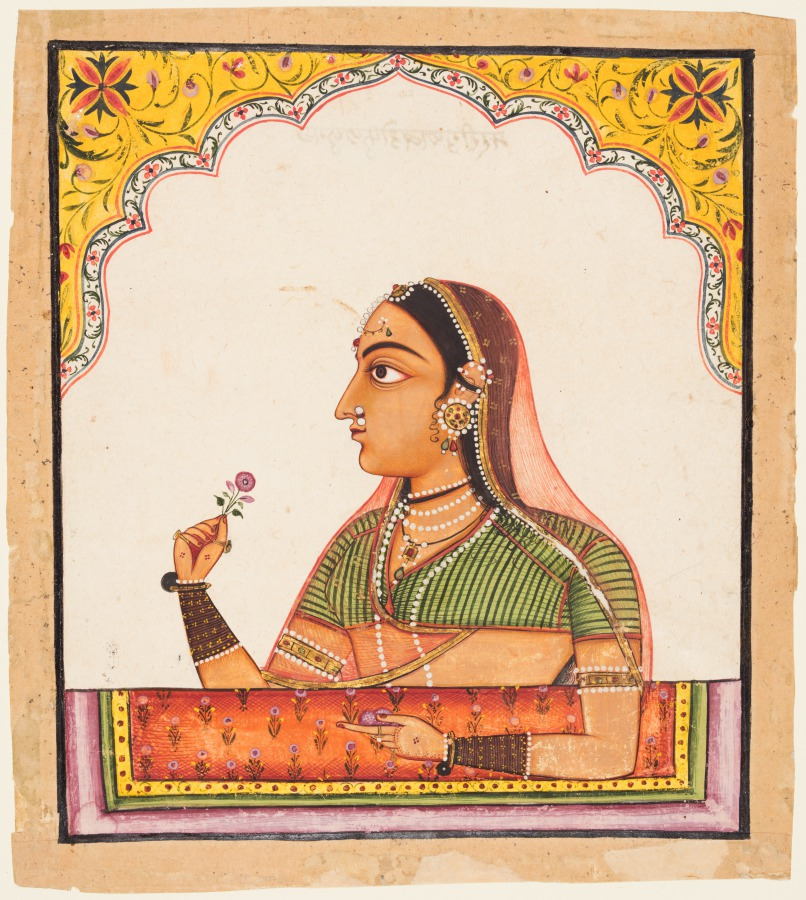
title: Noblewoman at a Jharokha Window Holding a Rose, from a Portraits of Women series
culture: Northwestern India, Rajasthan, Rajput Kingdom of Sawar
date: c. 1730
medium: gum tempera and gold on paper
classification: Painting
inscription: maharī gulāba kō phula lugachai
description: A royal woman stands on a palace balcony under a cusped arch. The carpet draped over the railing in front of her indicates to viewers that the person is a member of the royal family. The rulers of small kingdoms adopted the Mughal practice of locating the emperor in the jharokha window and expanded it to include other members of the royal household. They also adopted the Mughal taste for scalloped arches, swirling arabesque flowering-vine motifs, and images of flowering plants on the carpet. Her oversized eye emphasizes the importance of seeing and being seen.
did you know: The carpet is patterned with roses to match the flowers she holds.